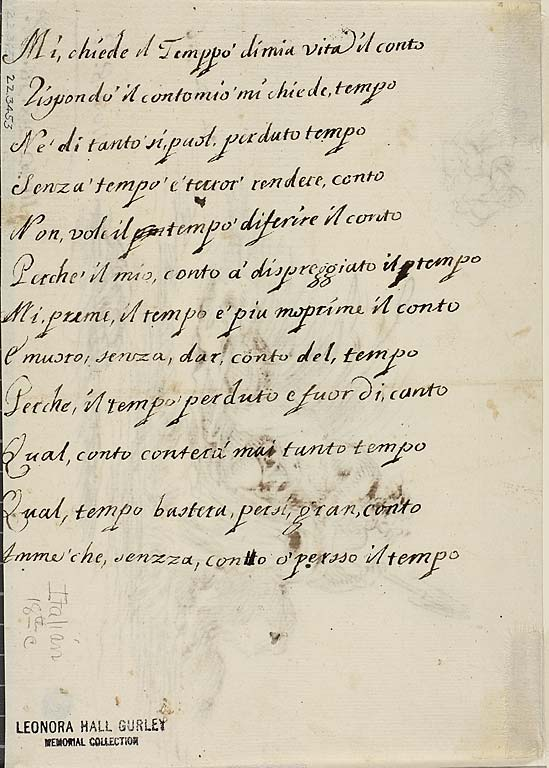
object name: Drawing and Watercolor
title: Recto: A River God; verso: a sonnet by Santi Rinaldi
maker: Unknown artist; Italian, late 17th century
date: late 1600s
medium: Pen and brown ink, with traces of graphite, on ivory laid paper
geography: Italy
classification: pen and ink drawings; drawings (visual works); prints and drawing